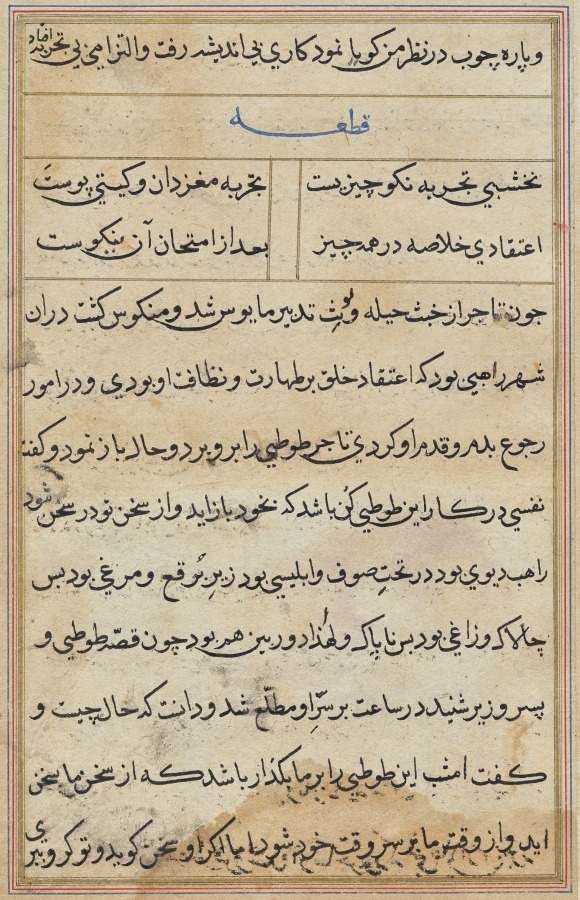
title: Page from Tales of a Parrot (Tuti-nama): text page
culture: Mughal India, court of Akbar (reigned 1556–1605)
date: c. 1560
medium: gum tempera, ink, and gold on paper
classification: Painting